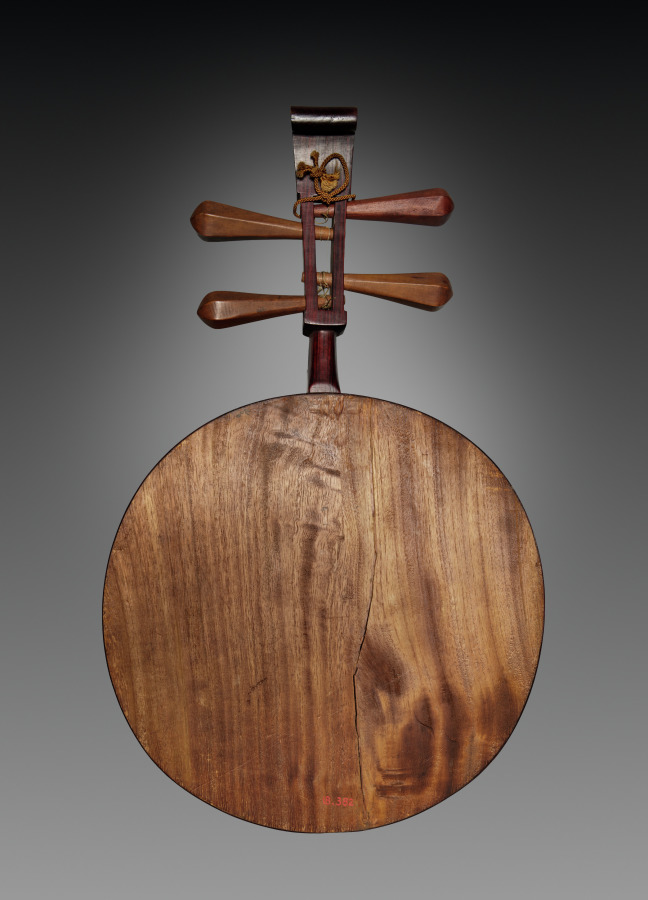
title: Moon Lute (Yueqin)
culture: China, Qing dynasty (1644-1911)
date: 1800s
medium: Rosewood, wutong (paulownia) wood, and gut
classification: Musical Instrument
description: Its resemblance to the full moon (yue 月) gives the yueqin its name. Found in popular ensembles, the Beijing and folk (jingxi) operas and used to accompany song, the yueqin has only recently been embraced by the modern Chinese orchestra. The player presses the strings between the frets making chord playing difficult but giving increased control over the timbre and intonation. Strings are plucked with fingernails or a pick using up-and-down strokes and tremolo techniques that sustain and provide color to a tone. It is known as gekkin in Japan.